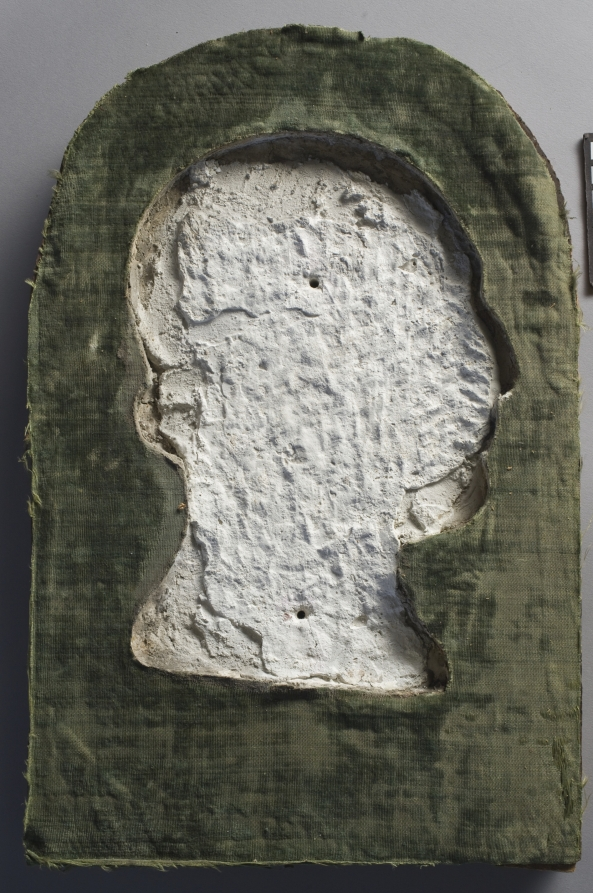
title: Portrait of Francesco Sforza (frame)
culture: Italy, Lombardy, 15th century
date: 1450–1499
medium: wood with gesso, polychromed and gilded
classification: Sculpture